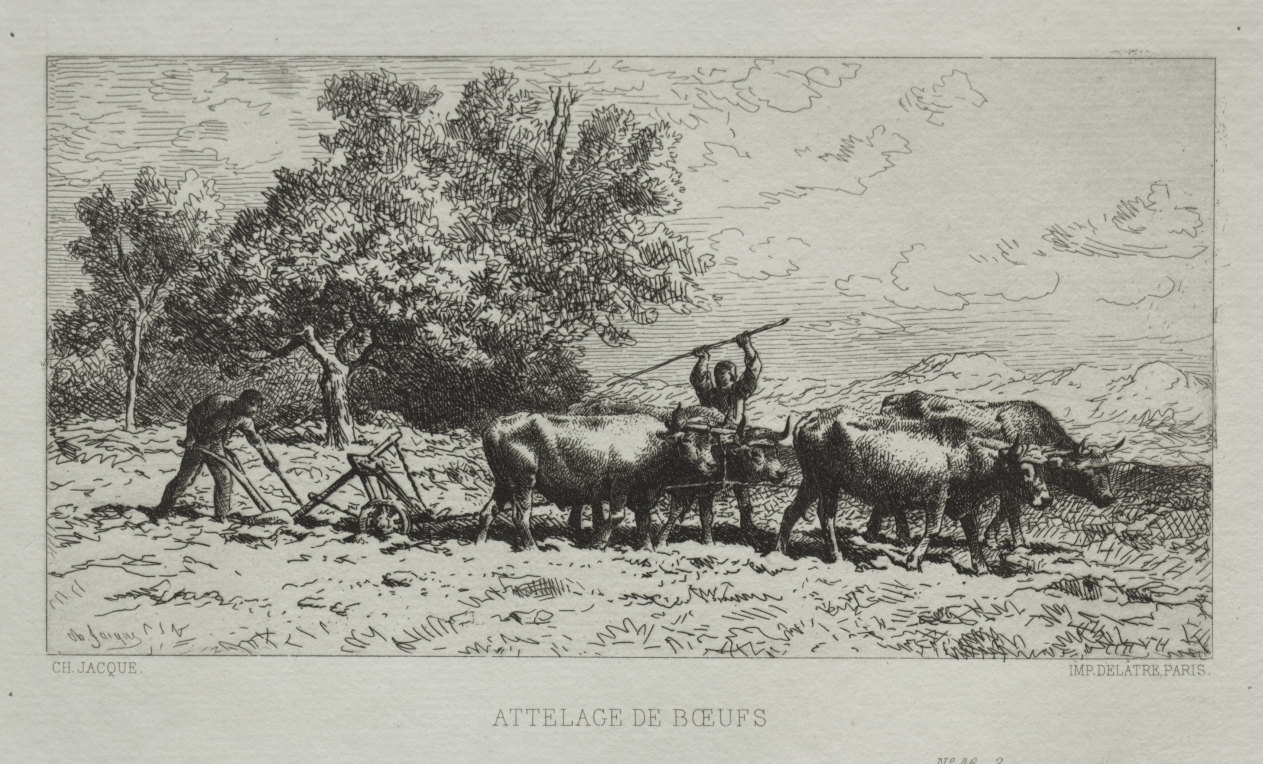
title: Team of Oxen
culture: France, 19th century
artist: Charles-Émile Jacque (French, 1813–1894)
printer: Auguste Delâtre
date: 1868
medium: etching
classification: Print